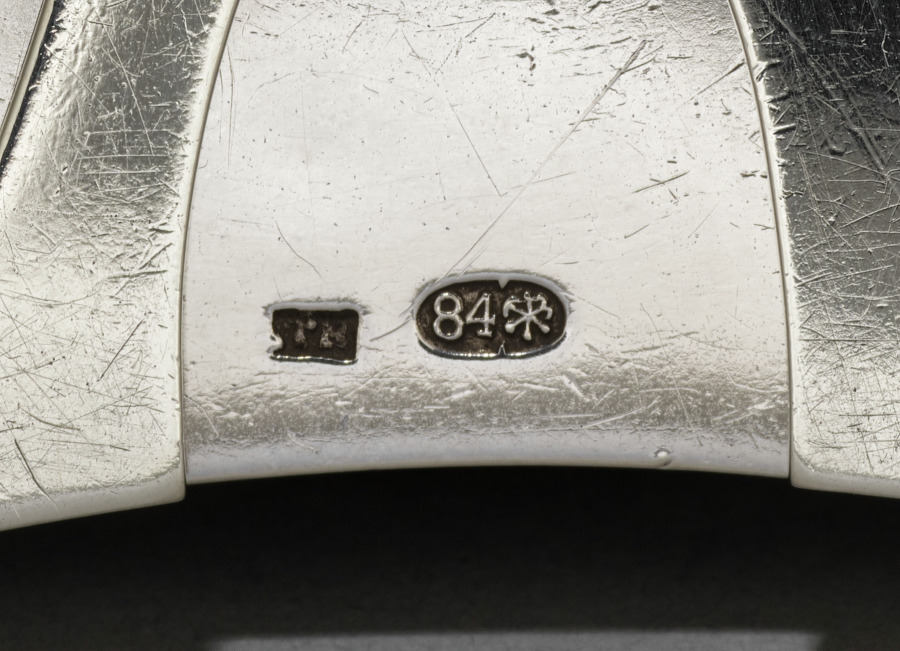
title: Frame with Portrait Miniature of Princess Yusopov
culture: Russian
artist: House of Fabergé (Russian, 1842–1918)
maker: Philip Theodor Ringe (Russian, 1824–1882)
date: c. 1893–96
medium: silver, ivory, watercolor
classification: Silver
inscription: Cyrillic initials “TR”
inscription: “84” silver standard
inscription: St. Petersburg coat of arms (crossed anchors and scepter)